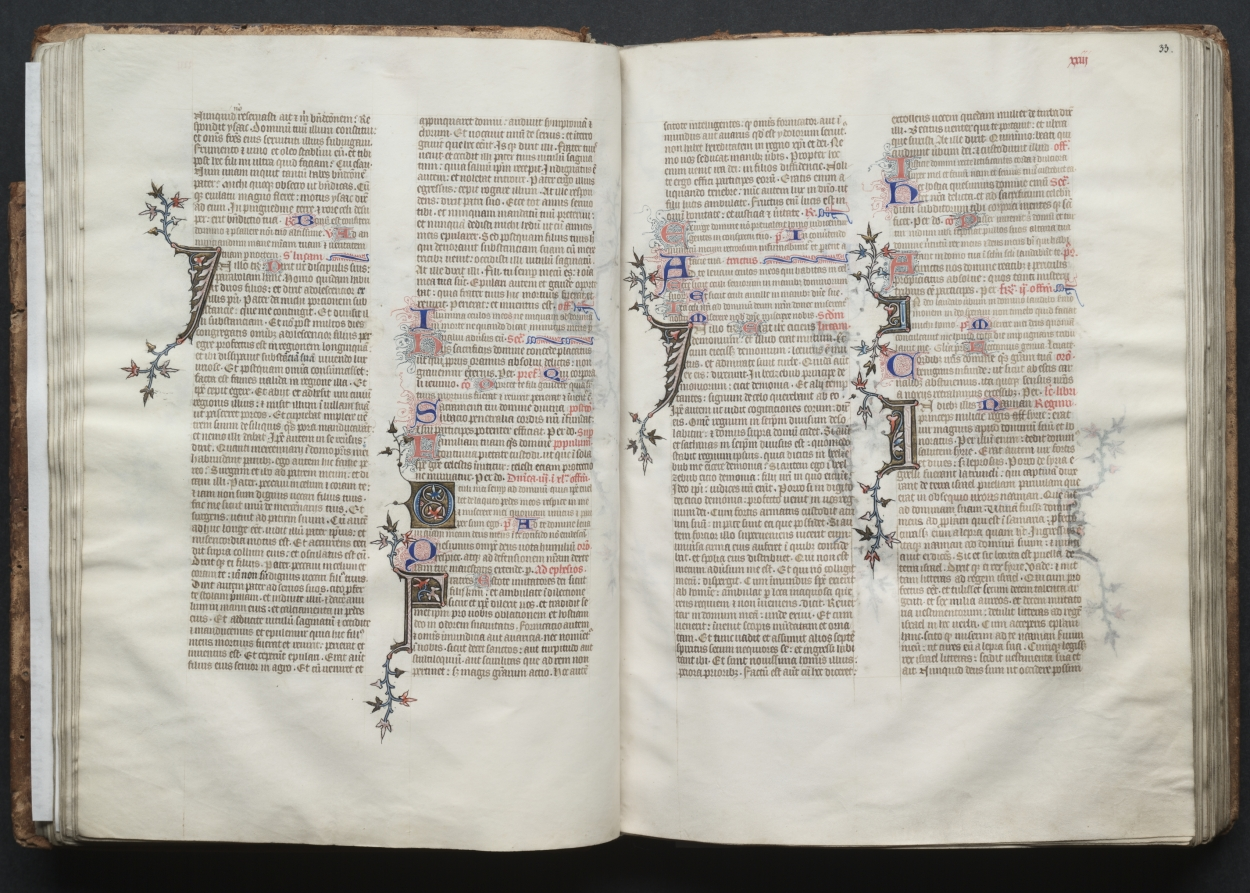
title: The Gotha Missal: Fol. 33r, Text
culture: France, Paris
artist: Master of the Boqueteaux (French)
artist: and Workshop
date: c. 1375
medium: ink, tempera, and gold on vellum; blind-tooled leather binding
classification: Bound Volume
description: The style and quality of this manuscript's decoration is typical of deluxe Parisian books made for aristocratic or royal patrons. Most of the book's decoration appears to be the work of the Master of the Boqueteaux, an artist active at the court of King Charles V (died 1380). His style was apparently shared by a number of book illuminators working in and around Paris. It is very possible that the Gotha Missal belonged to Charles V, but is not provable because the manuscript has no royal portraits and lacks a colophon. Given the book's magnificent decoration, however, it would seem that it was produced for a Valois prince, if not for the king himself. The manuscript receives its name from the German dukes of Gotha, its later owners.